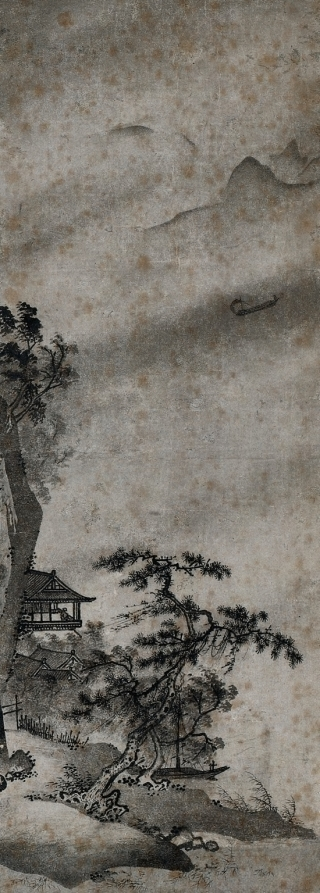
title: Windy Landscape with Sailboat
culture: Japan, Muromachi period (1392–1573)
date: mid-1400s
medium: hanging scroll; ink on paper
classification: Painting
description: Windy Landscape depicts the humble waterside retreat of an official retired from government service. For government officials, retreating from the city to a remote locale was the ideal retirement, though difficult to attain. In this scroll the retiree gazes out over the watery expanse past the sailboat to the mist-covered mountain in the far distance. The artist has achieved this depth of composition through carefully placed brushstrokes and ink washes.